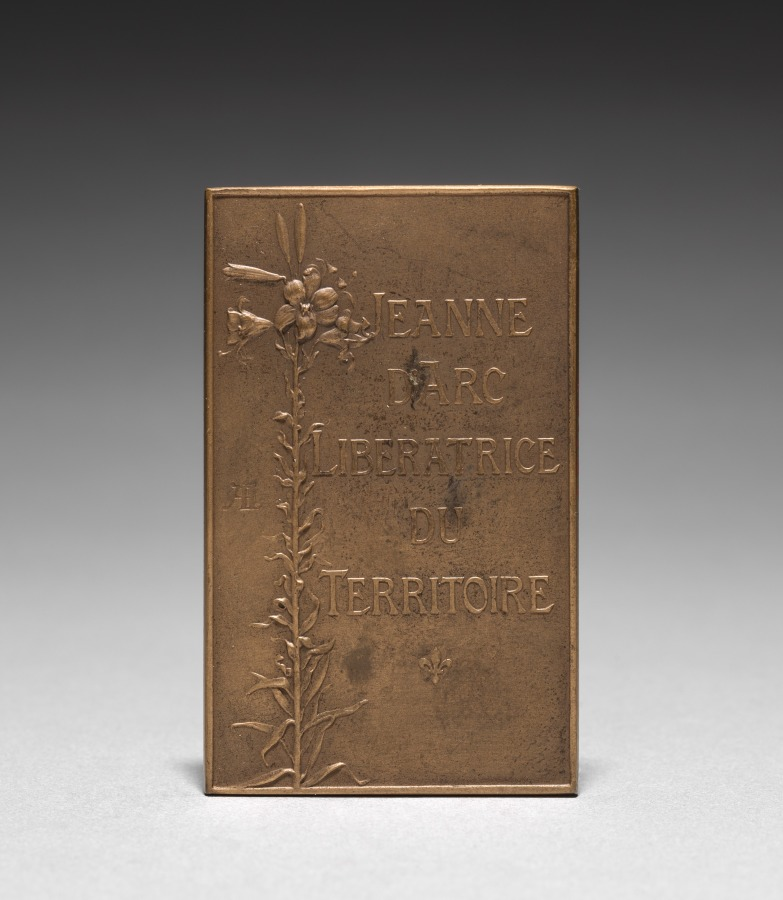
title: Medallion: Jeanne d'Arc (reverse)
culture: France, 19th century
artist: Daniel Dupuis (French, 1819–1899)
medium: bronze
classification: Metalwork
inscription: "Jeanne d'Arc Liberatrice du Territoire."